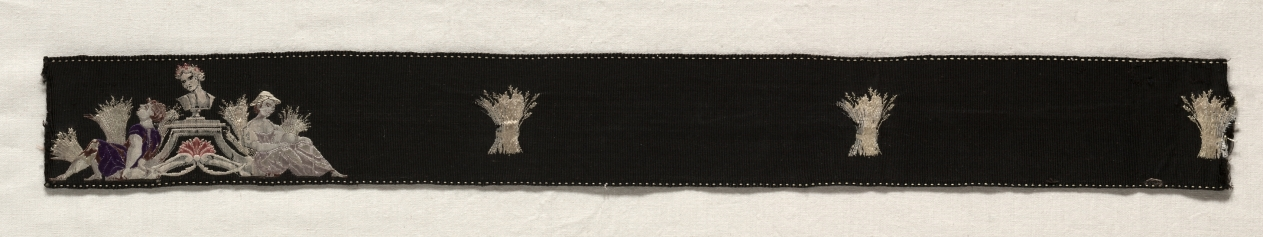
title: Ribbon: "Allegories of Harvest"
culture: England, early-mid-19th century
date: 1800 – 1850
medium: patterned tabby weave; silk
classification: Textile